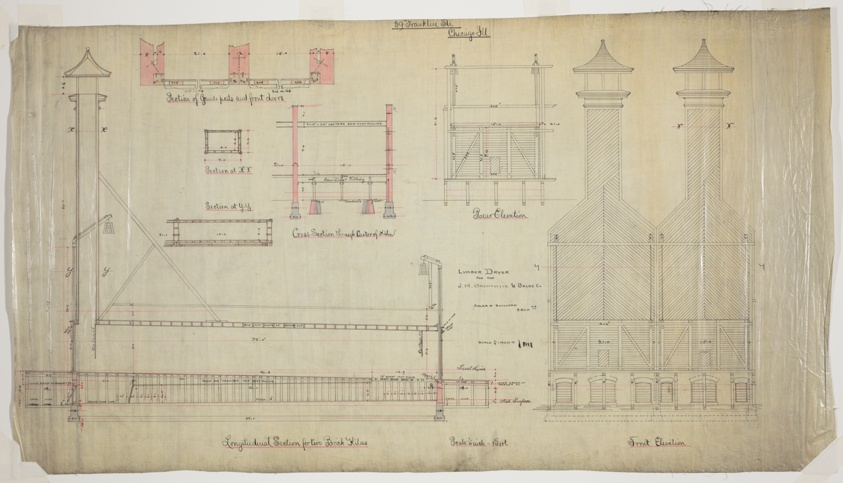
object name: Architectural Drawing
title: J.M. Brunswick and Balke Company Lumber Dryer, Chicago, Illinois, Elevation and Section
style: 19th century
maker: Adler & Sullivan; American, fl. 1883–1895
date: c. 1883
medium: Black and red ink on linen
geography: Chicago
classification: architectural working drawing; architectural drawing; architecture; elevation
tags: buildings, drawing, design, architecture, elevation, illinois, Chicago